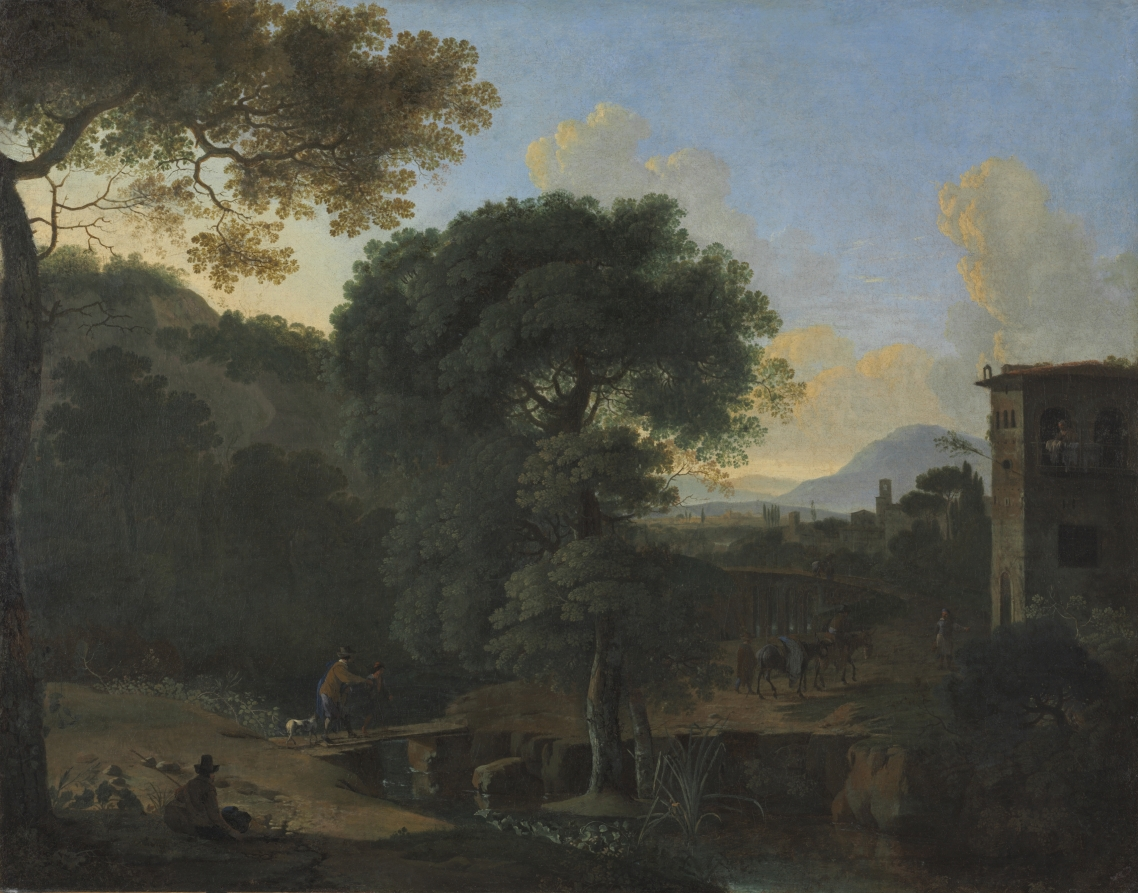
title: Landscape with Travelers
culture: Netherlands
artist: Herman van Swanevelt (Dutch, c. 1600–1655)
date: 1630s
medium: oil on canvas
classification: Painting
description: Swanevelt played an important role in the development of 17th-century landscape painting in Rome. Often regarded as a follower of Claude Lorrain (1600-1682), with whom he briefly shared a home, most scholars now believe that the influence was mutual. Swanevelt's landscapes are distinguished by the use of Roman peasants, rather than the classical figures preferred by his contemporaries.